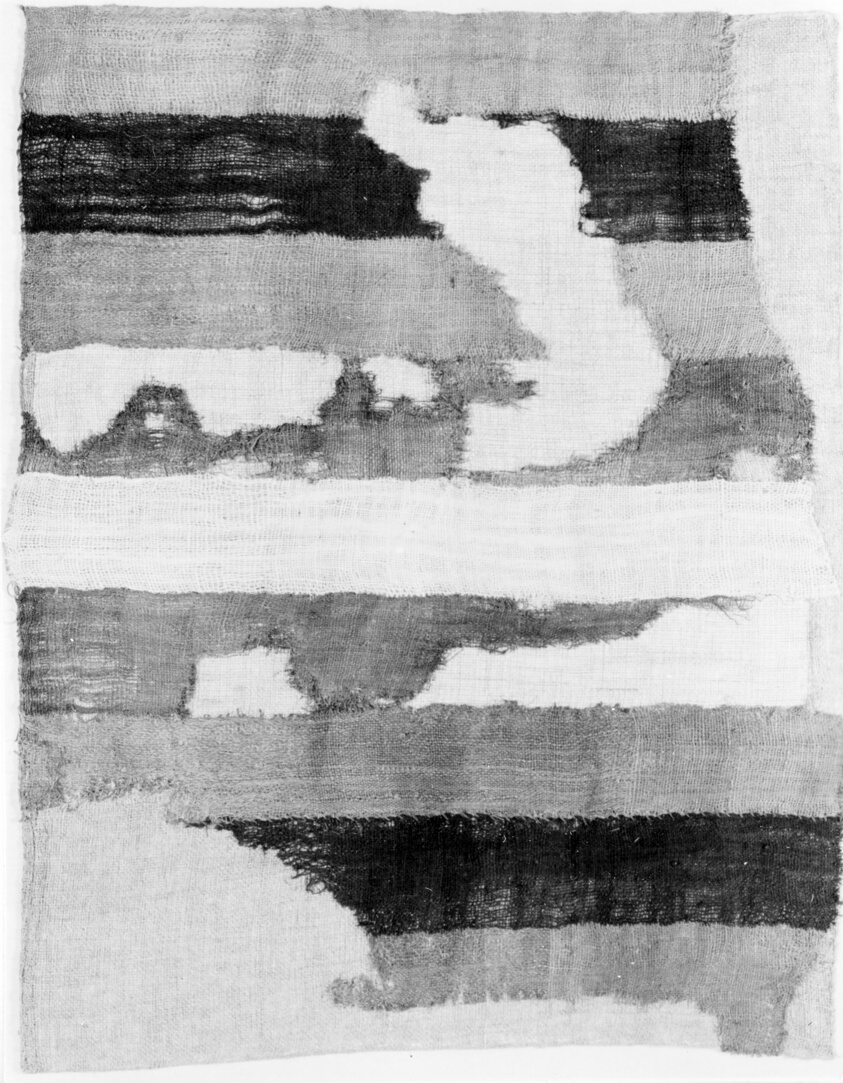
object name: Textile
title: Fragment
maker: Peru, south coast, Palpa Valley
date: A.D. 1000/1476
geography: Peru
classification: textile; weaving